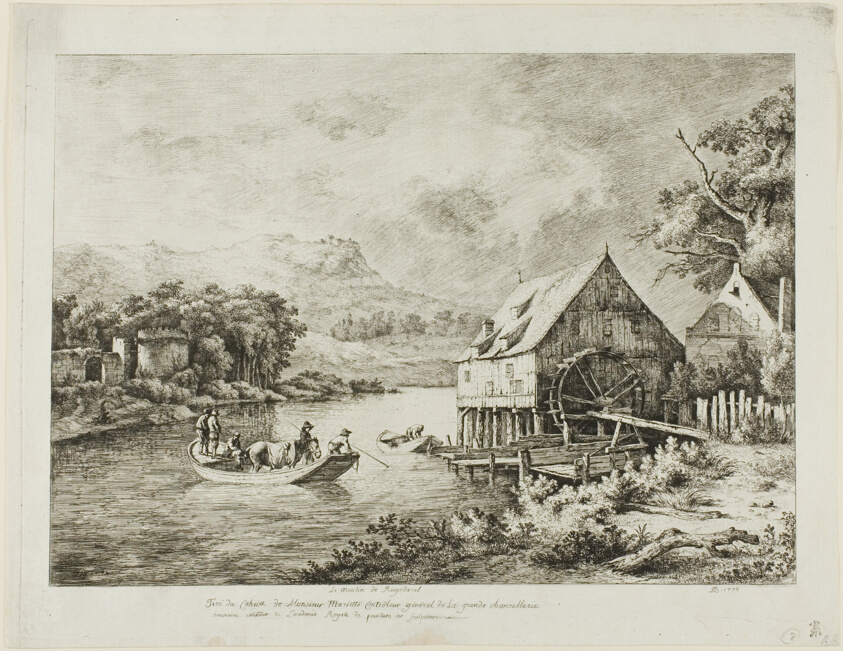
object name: Print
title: Crossing near the Watermill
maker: Jean Jacques de Boissieu (French, 1736-1810); after Jacob van Ruisdael (Dutch, 1628/29-1682)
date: 1807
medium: Etching on paper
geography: France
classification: etching; print; prints and drawing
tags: landscapes